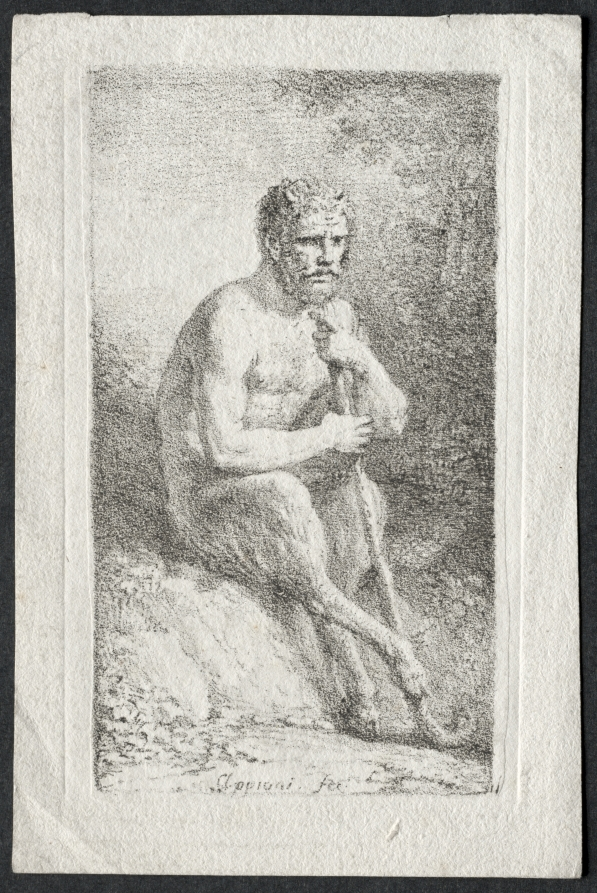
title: Satyr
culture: Italy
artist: Andrea Appiani (Italian, 1754–1817)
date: c. 1808–12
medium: softground etching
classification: Print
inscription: in plate: Appiani fec. verso, in graphite: Appiani 1754-1817